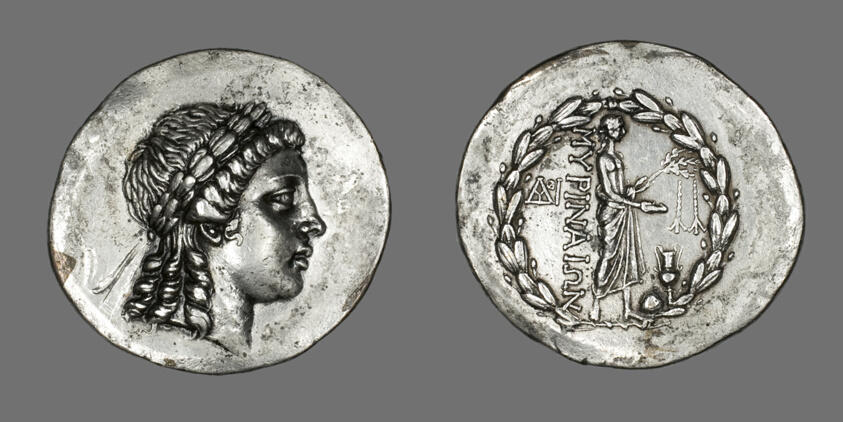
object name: Coin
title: Tetradrachm (Coin) Depicting the God Apollo Gryneios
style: greek, ancient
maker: Greek; minted in Myrina, Aeolis, Asia Minor (now Turkey)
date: 189 BCE or later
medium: Silver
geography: Greece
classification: coin; ancient art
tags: goddesses, gods (deities)